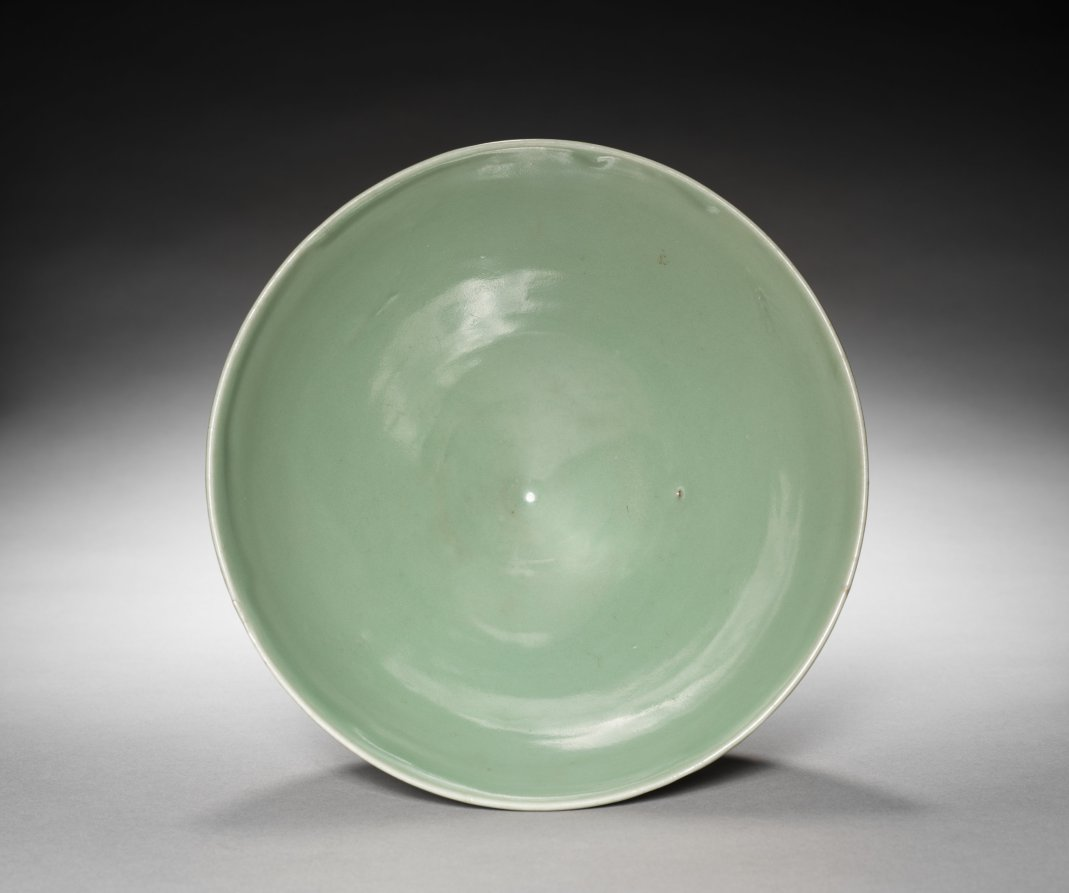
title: Lotus Bowl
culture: China, Zhejiang province, Longquan region, Southern Song dynasty (1127-1279)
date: 1200s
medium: green-glazed porcelaneous stoneware, Longquan ware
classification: Ceramic